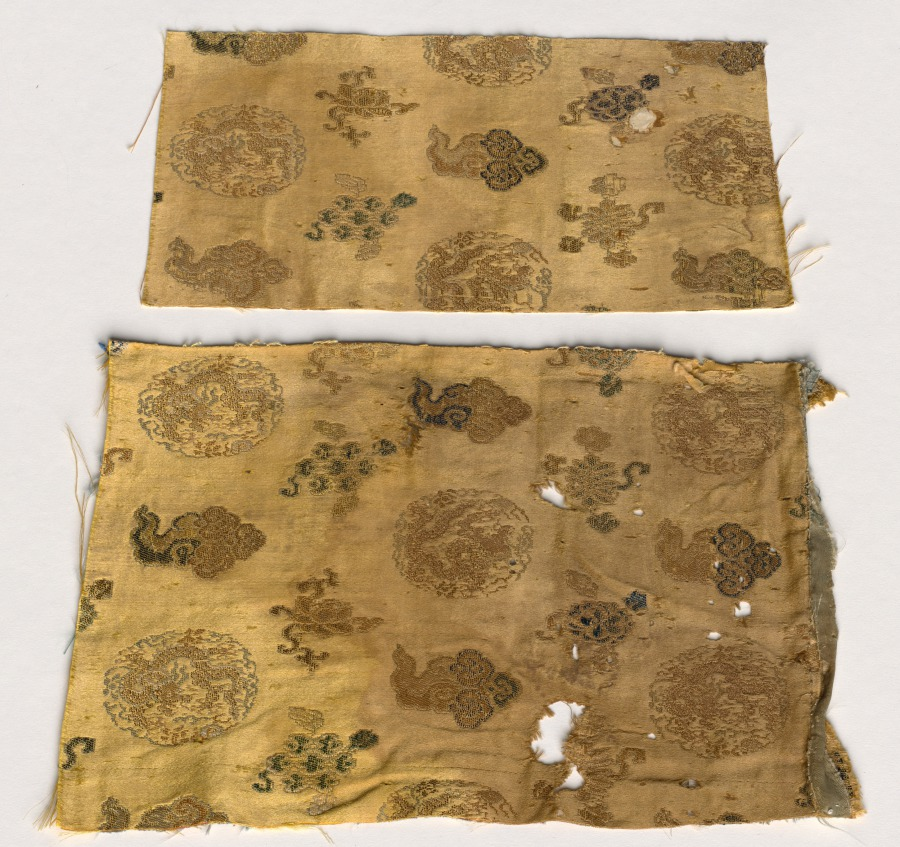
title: Fragments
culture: China, 18th century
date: 1700s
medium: brocaded satin, silk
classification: Textile